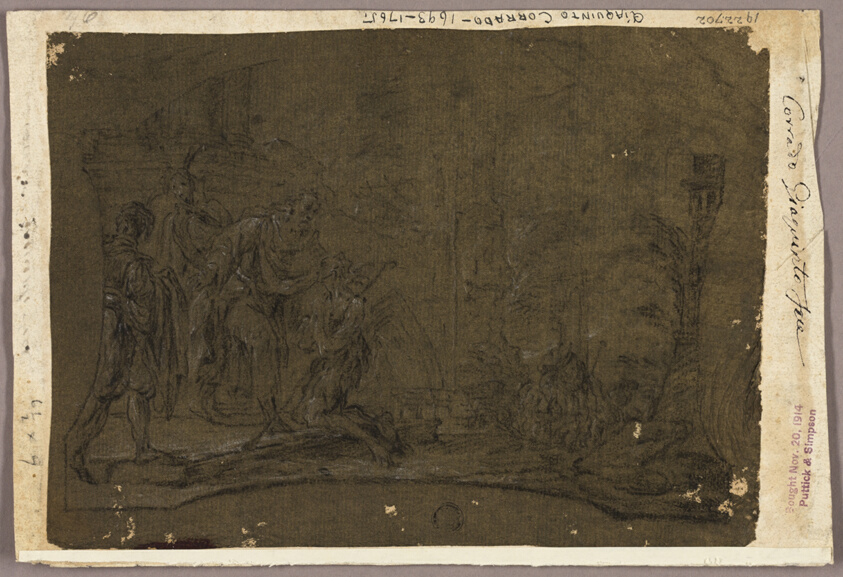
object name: Drawing and Watercolor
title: Diana and Nymphs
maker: Attributed to Alessandro Magnasco (Italian, 1667-1749); or the style of Francesco Monti (Italian, 1685-1768); or after Corrado Giaquinto (Italian, 1693/99-1765)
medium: Black chalk heightened with touches of white chalk on brown tinted laid paper, laid down on ivory laid paper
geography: Italy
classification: chalk; drawings (visual works); prints and drawing